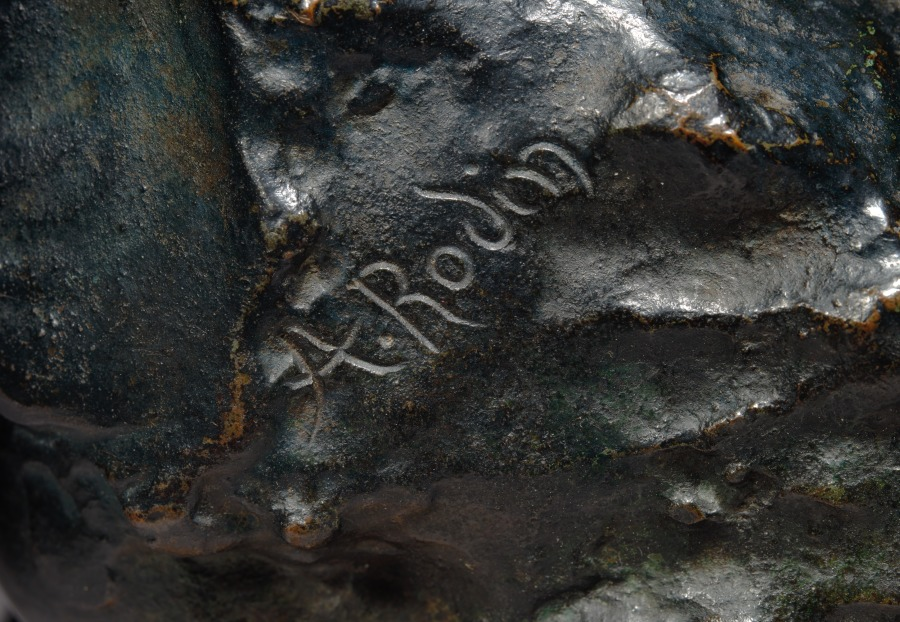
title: Head of the Little Martyr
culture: France, late 19th-early 20th century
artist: Auguste Rodin (French, 1840–1917)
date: c. 1880 – 1885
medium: bronze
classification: Sculpture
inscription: Signed sinister side: "A. Rodin"; inside front in relief: "A. Rodin"